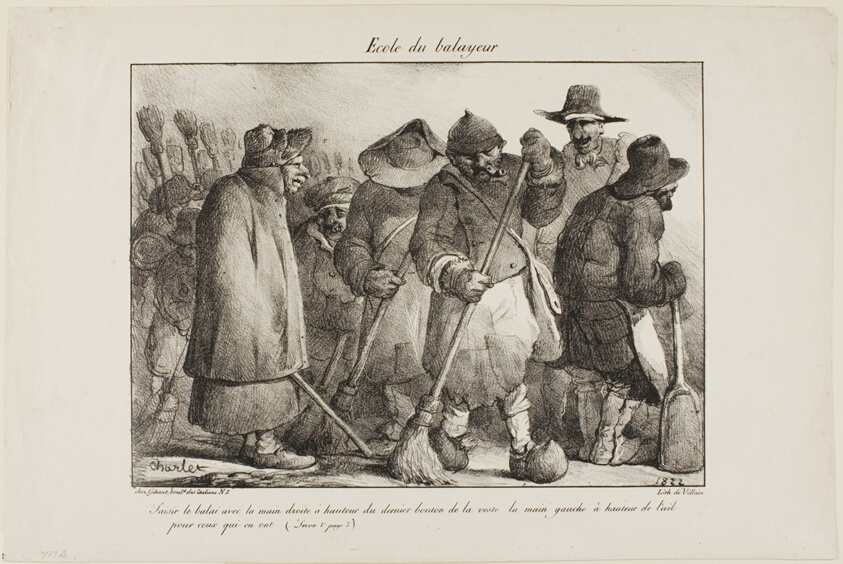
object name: Print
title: School for Street-Sweepers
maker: Nicolas Toussaint Charlet (French, 1792-1845); published by Fères Chez Gihaut (French, 19th century); printed by François le Villain (French, active early 19th century)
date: 1822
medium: Lithograph in black on ivory wove paper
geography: France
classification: lithograph; print; prints and drawing